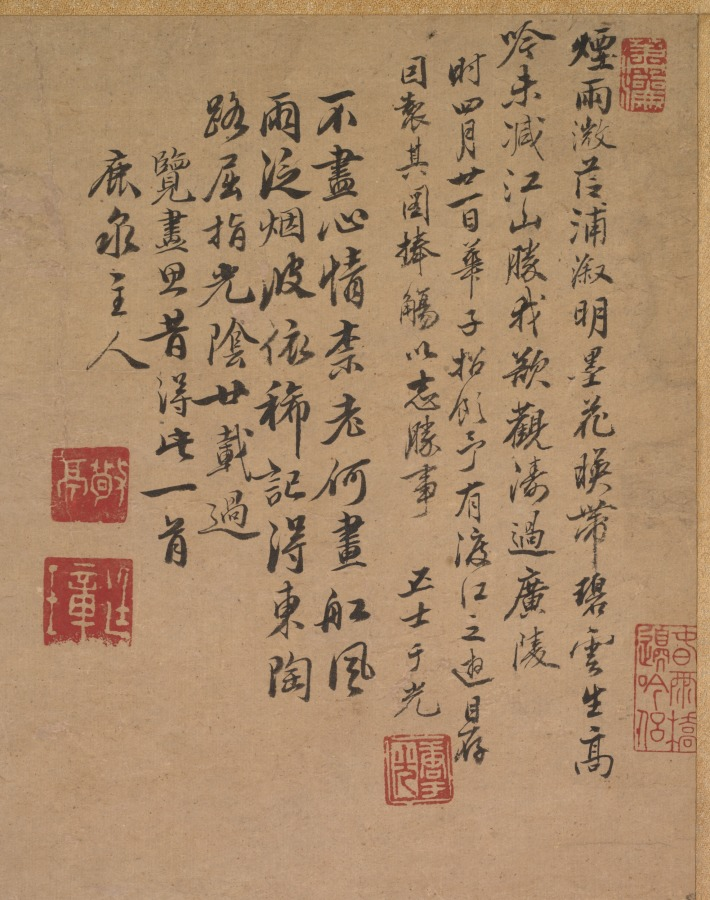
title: The Crossing of the Yangzi River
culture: China, Qing dynasty (1644-1911)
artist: Shang Rui (Chinese, 1634?-)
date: c. 1700–1720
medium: hanging scroll, ink and slight color on paper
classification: Painting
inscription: Colophons: One upper left inscription by the artist followed by two seals; one upper right inscription followed by two seals; three other seals, one in lower left